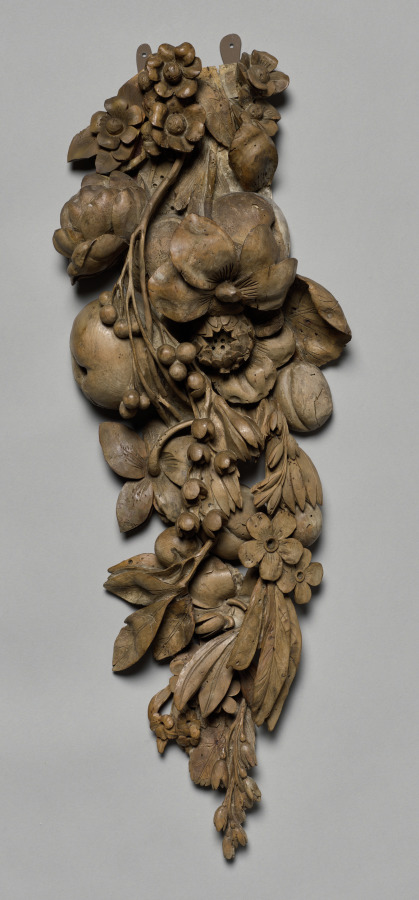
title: Carving from an Overmantel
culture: England, 17th century (Charles II)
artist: Grinling Gibbons (British, 1648–1721)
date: c. 1675–1677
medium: lindenwood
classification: Sculpture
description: The arrangement of architectural elements within grand interior spaces in the late 1600s and early 1700s emphasized symmetry and height. Decorative elements such as elaborately carved mantels, mirrors, paintings, and applied wall decorations were often stacked to achieve a visual focal point at one or both ends of the room. This particular overmantel decoration once hung above the fireplace in the Green Drawing Room of the Earl of Essex at Cassiobury in Watford, near London. In 1823, the British painter William Henry Hunt (1790–1864) produced a watercolor of the drawing room which featured this overmantel decoration. Grinling Gibbons was born in Rotterdam, the Netherlands, of English parents. After training there as an artist, he came to England in the 1660s and soon began to work as a sculptor of interior ornament, particularly in wood. One of his first large-scale decorative projects was the series of interiors at Cassiobury House.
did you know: The swags of fruit and foliage featured in this wooden overmantel decoration evoke the bounty of the English countryside.